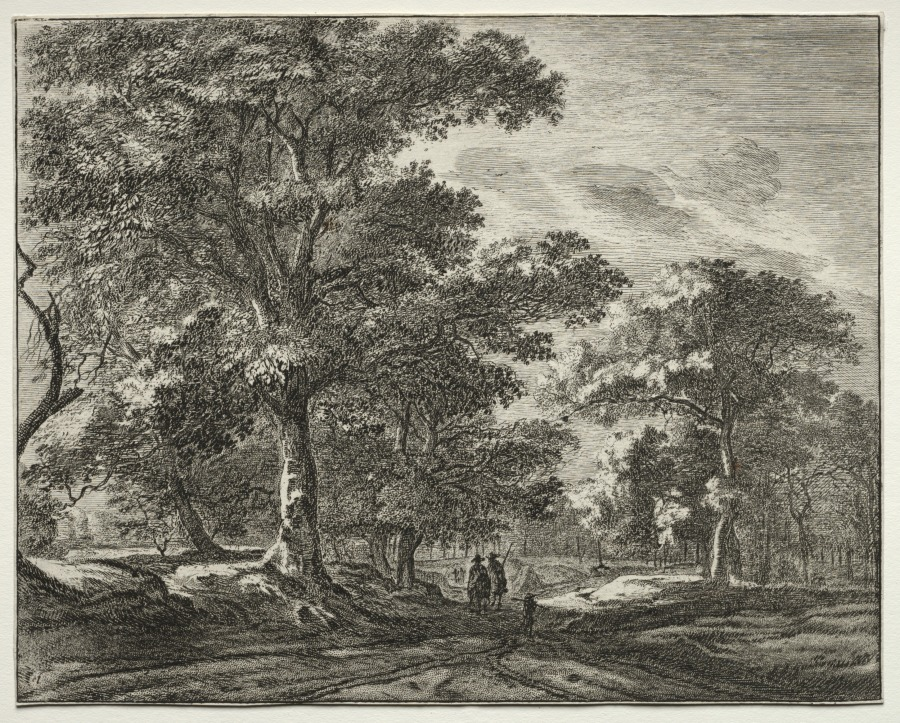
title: Six views in the Wood of the Hague (series)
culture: Netherlands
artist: Roelant Roghman (Dutch, 1627–1692)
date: 1640–52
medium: etching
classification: Print